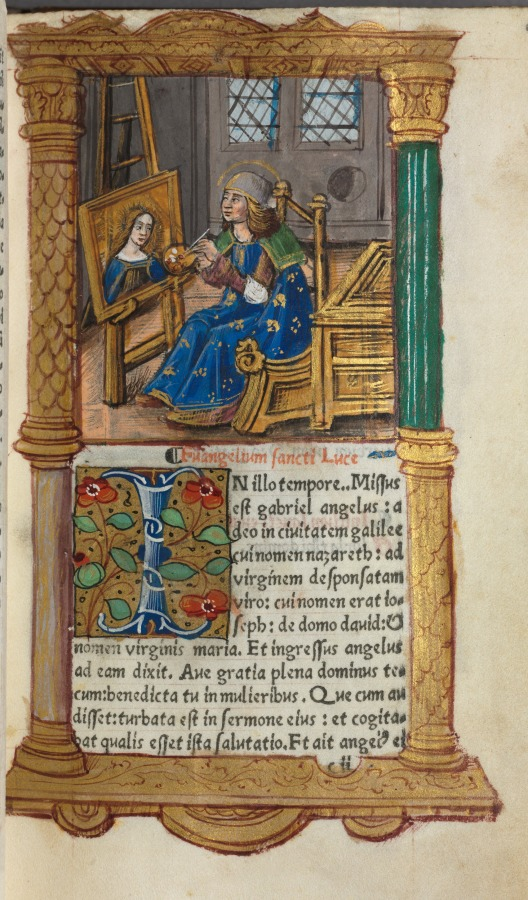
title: Printed Book of Hours (Use of Rome): fol.18r, St. Luke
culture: France, Paris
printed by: Guillaume Le Rouge (French, Paris, active 1493–1517)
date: 1510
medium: 112 Printed folios on parchment, bound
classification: Bound Volume